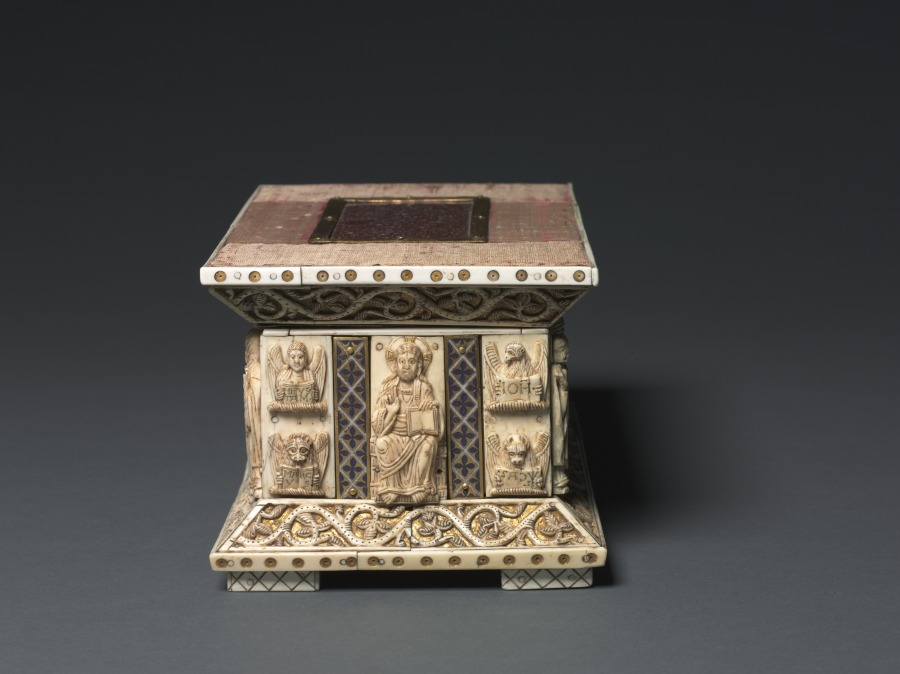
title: Portable Altar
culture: Germany, Cologne, Gothic Period, 13th century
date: c. 1200–1220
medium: walrus ivory, gilded copper, porphyry, champlevé enamel, wood core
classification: Ivory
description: The principal decoration of this portable altar is carved of walrus ivory. On the long sides are traditional figures of standing apostles. On the short sides are the seated Virgin with the Magi, and Christ the Judge between the symbols of the Evangelists. The commercial ties between the Rhineland and the Norse peninsula made walrus ivory easily available to the city of Cologne, one of the most important artistic centers in medieval Germany.